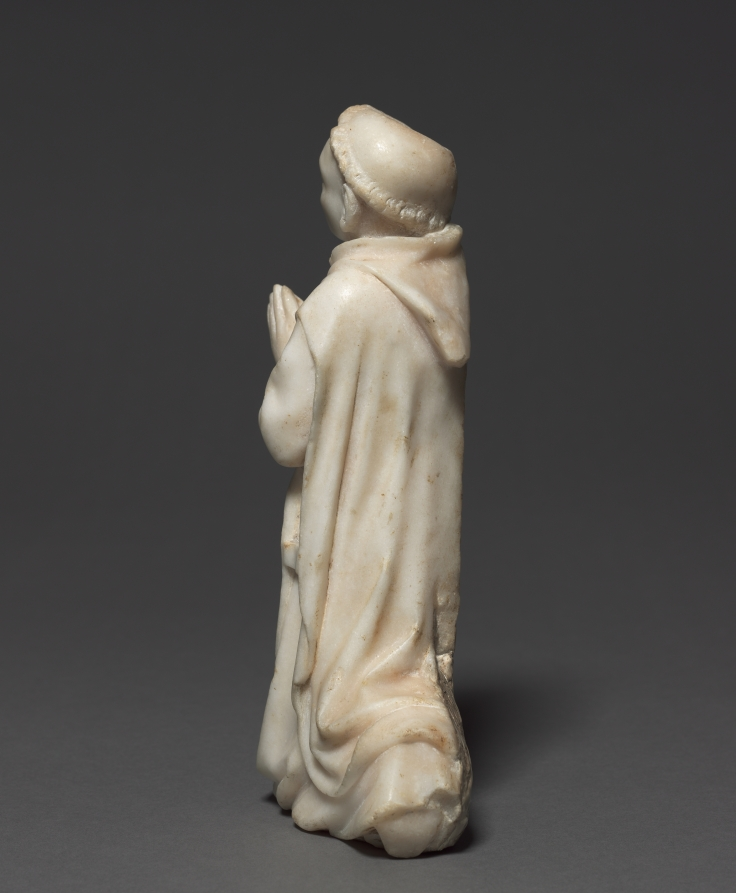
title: Kneeling Carthusian Monk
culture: France, Burgundy, Dijon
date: c. 1380–1400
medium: marble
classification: Sculpture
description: These are the only known surviving sculpted examples of kneeling Carthusian monks. These two figures would have formed part of a private devotional group, probably in a monk’s cell, with a sculpture of the crucified Christ or the Virgin positioned between them. They wear the recognizable white scapular, a hooded garment with front and back panels tied together with a tab.